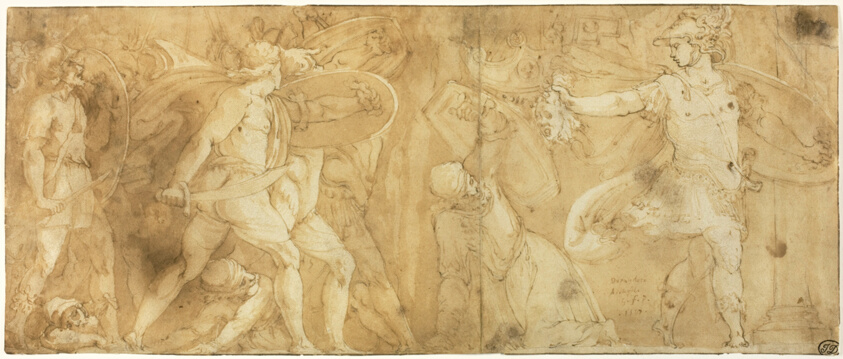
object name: Drawing and Watercolor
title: Perseus with the Head of Medusa, Turning Phineus and his Followers to Stone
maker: After Polidoro Caldara, called Polidoro da Caravaggio; Italian, c. 1499-c. 1543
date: 1567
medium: Pen and brown ink, with brush and brown wash, over black chalk, on ivory laid paper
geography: Italy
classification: ink with wash; drawings (visual works); prints and drawing